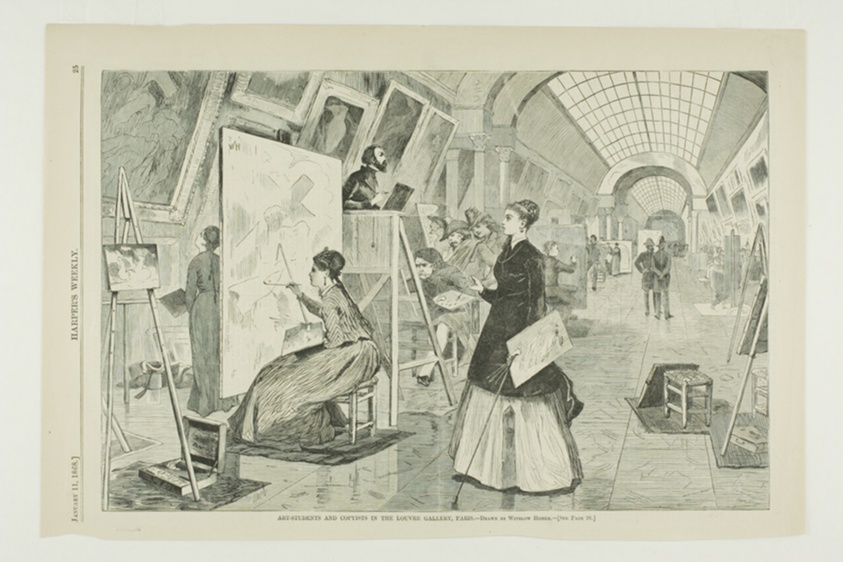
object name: Print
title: Art Students and Copyists in the Louvre Gallery, Paris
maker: Winslow Homer (American, 1836-1910); published by Harper's Weekly (American, 1857-1916)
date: published January 11, 1868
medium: Wood engraving on buff wove paper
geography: United States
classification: wood engraving; print; prints and drawing